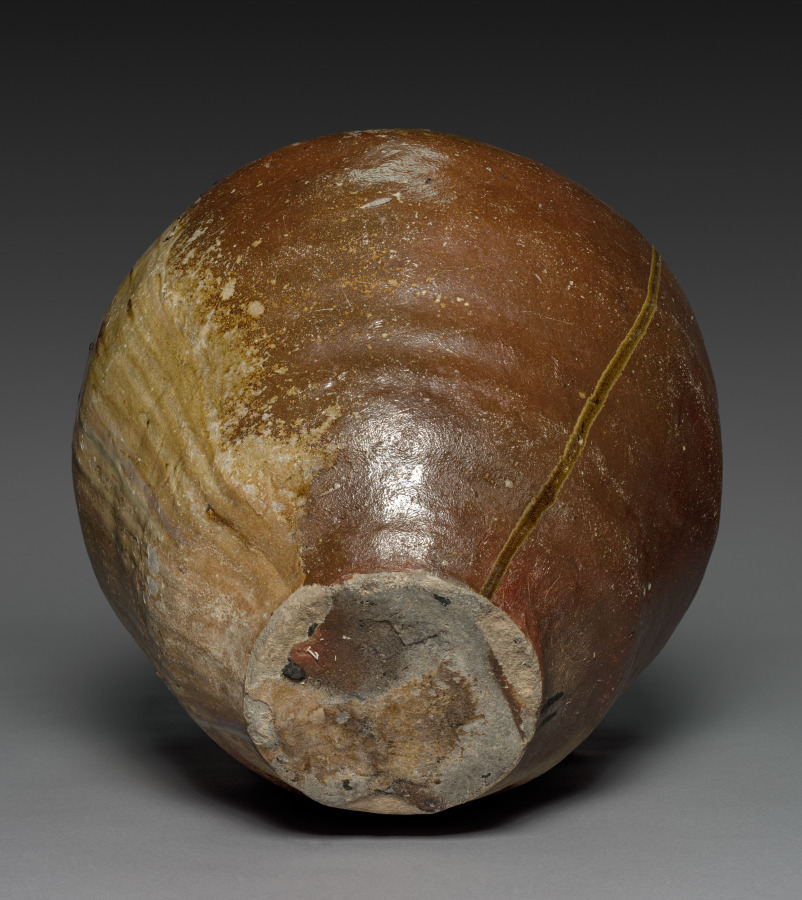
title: Storage Vessel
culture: Japan, Muromachi period (1392–1573)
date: 1400s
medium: stoneware with natural ash glaze (Echizen ware)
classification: Ceramic